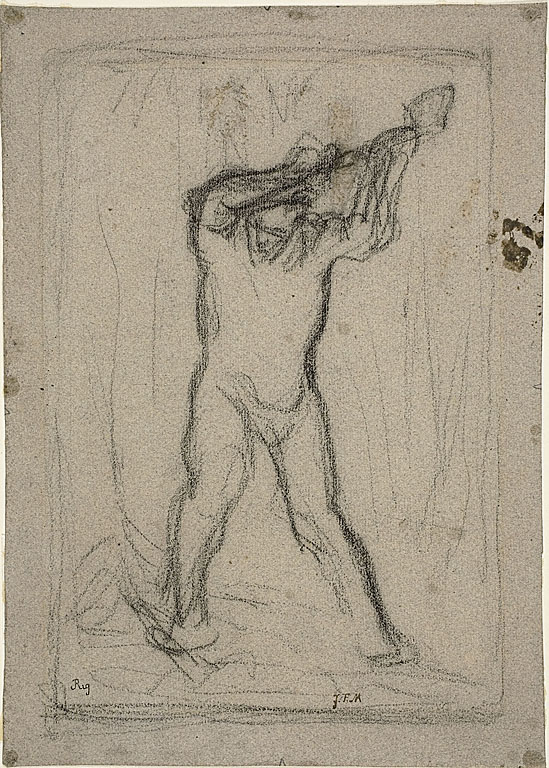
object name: Drawing and Watercolor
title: The Woodchopper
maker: Jean François Millet (French, 1814-1875)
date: c. 1848–1850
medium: Black chalk, on gray laid paper with blue and red fibers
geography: France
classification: chalk; drawings (visual works); prints and drawing